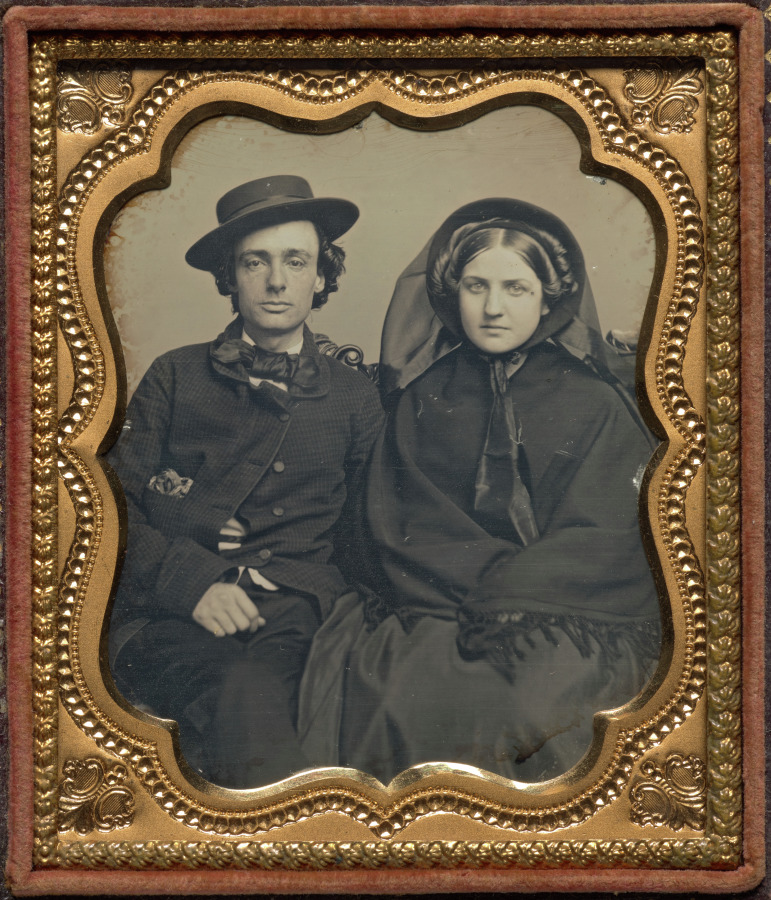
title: Seated couple in mourning attire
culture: America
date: c. 1856–58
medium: daguerreotype, sixth plate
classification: Photograph